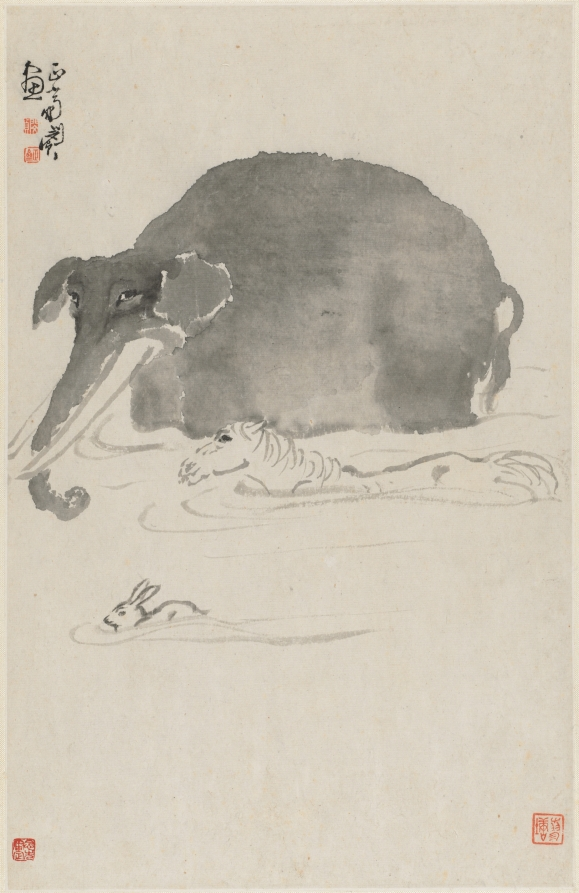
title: Elephant, Horse, and Hare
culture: China, Qing dynasty (1644-1911)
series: Album of Miscellaneous Subjects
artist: Min Zhen (Chinese, 1730–after 1788)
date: 1788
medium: album leaf, ink on paper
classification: Painting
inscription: Six seals appearing on the leaves: Min Zhen 閔貞; Zheng zhai 正齋; Qingqiao 青橋; Zhen 貞; Liao tang 蓼塘; Min Zhen zhi yin 閔貞之印。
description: Min Zhen, who was orphaned at age 12 and developed an eccentric personality, was trained by Tang Yin (1682–1756), a writer, playwright, and superintendent of the imperial porcelain workshops in Jingdezhen. The connection to him may have enabled Min to stay in Beijing for a decade from around 1773. It is not clear whether he ever resided in Yangzhou, but his style is in many instances reminiscent of that of Yangzhou artist Huang Shen. The album was painted for the artist's friend Dailili Shanren in exchange for a scholar’s stone. The paintings demonstrate Min Zhen’s versatility and mature style in the last years of his life. This leaf, Elephant, Horse, and Hare, seems to exhibit a contest, and may be associated with the recipient’s affinity to Buddhism (elephant), Confucianism (horse), and Daoism (hare).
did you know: The artist might have seen an elephant in the imperial zoo when he worked in Beijing from 1773 to 1784.